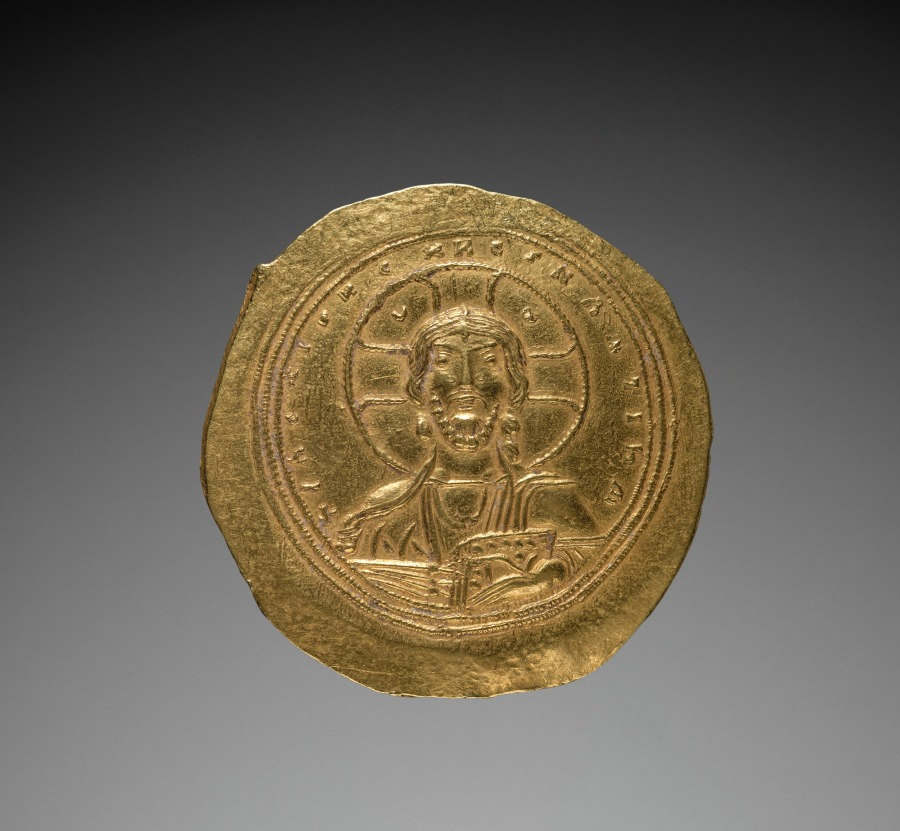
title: Nomisma with Constantine IX Monomachus (obverse)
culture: Byzantium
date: 1042–1055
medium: gold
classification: Coins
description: Byzantine Gold Coins The vast number of surviving Byzantine coins attests to the level of trade across the empire. Controlled and supervised by the emperor, the producers of coins took care to represent his authority and reflect his stature. Talented artists were recruited to engrave the dies (molds) used for the striking of coins. Emperors increasingly came to include their heirs and co-emperors on their coinage, as well as other family members or even earlier rulers. Coins were recognized, then as now, as small, portable works of art. With their inscriptions and images, Byzantine coins provide valuable documentation of historical events and a record of the physical appearance of the emperors. The coins shown here include the solidus, the basic gold coin of 24 karats; the tremissis, a gold coin of one-third the weight and value of the solidus; and the nomisma, which in the 10th century replaced the solidus as the standard gold coin.